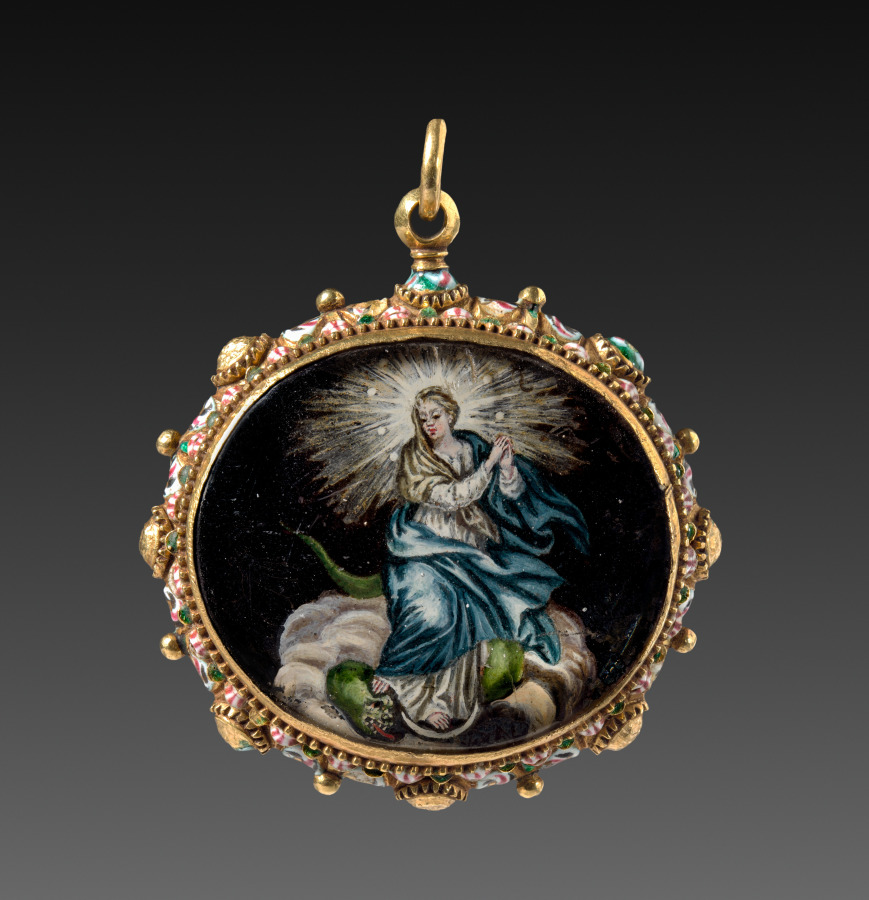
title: Pendant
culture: Spain ?, 17th-18th century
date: 1600s - 1700s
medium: metal and enamel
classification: Jewelry